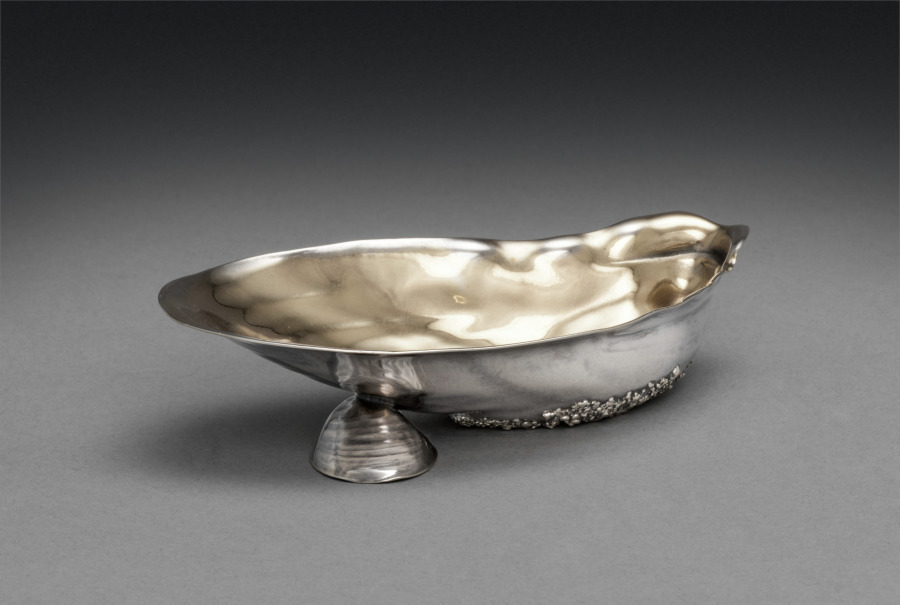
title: Seashell Salt with Shell and Crab Spoon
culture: America, Rhode Island, Providence, 19th century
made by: Gorham Manufacturing Company (America, est. 1831)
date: 1884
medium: handwrought sterling silver, partially gilt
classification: Silver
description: This small salt dish and spoon reflect the late 19th-century interest in incorporating naturalistic details into the design of useful pieces-in this instance probably inspired by Japanese examples.